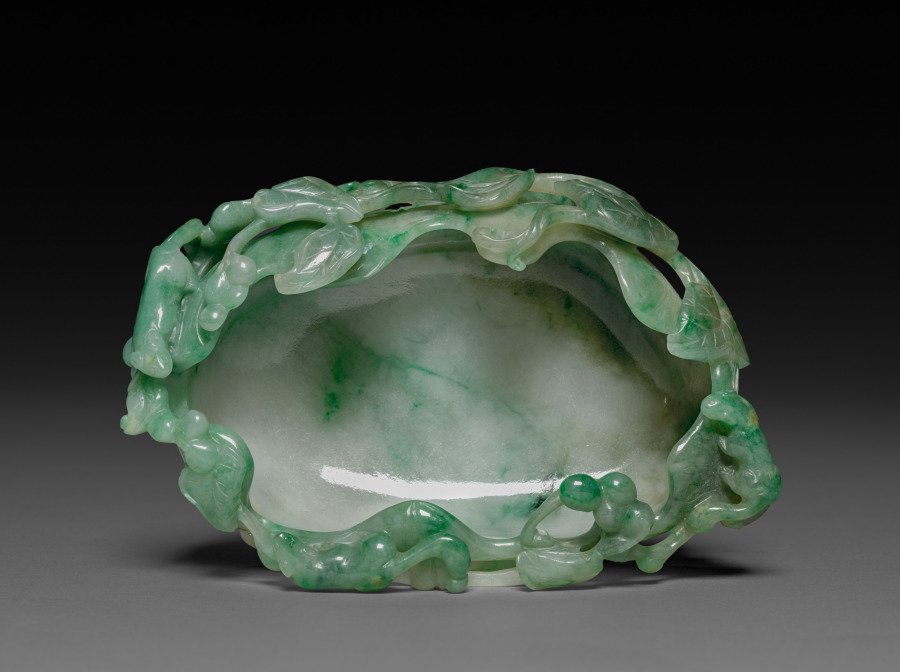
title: Brushwasher in Shape of Lotus Leaf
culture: China, Qing dynasty (1644-1911)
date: 19th Century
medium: translucent jadeite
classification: Jade